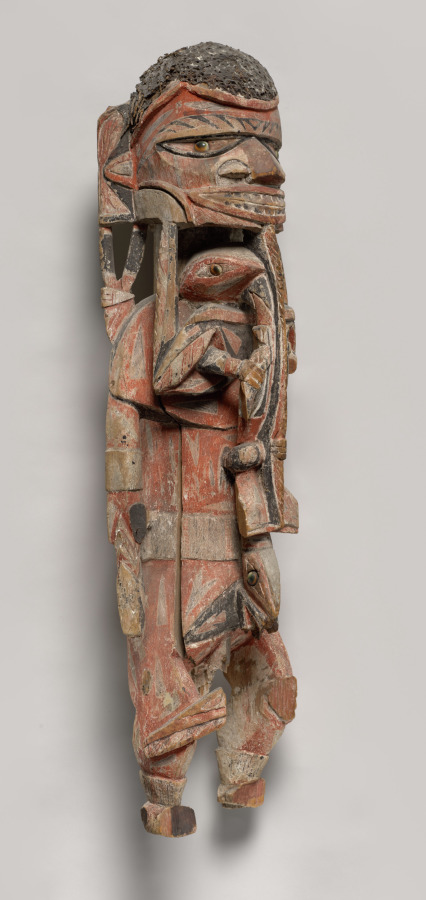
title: Malagan Memorial Festival Pole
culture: Melanesia, New Ireland, 19th century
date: 1800s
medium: painted wood, sea snail opercula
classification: Sculpture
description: At the death of an important individual in New Ireland society, villagers begin preparations for an elaborate funeral (malagan) ceremony. Food is collected for feasts, and artists are commissioned to carve elaborate sculptures and masks. Neighboring groups are invited to the ceremonies, which last for days and include speeches, dancing, music, feasts, and exchanges of goods. The ceremonies climax in the display of the elaborately carved, brightly painted art works. After the guests' departure, the malagan sculptures and masks are discarded, or sometimes stored.